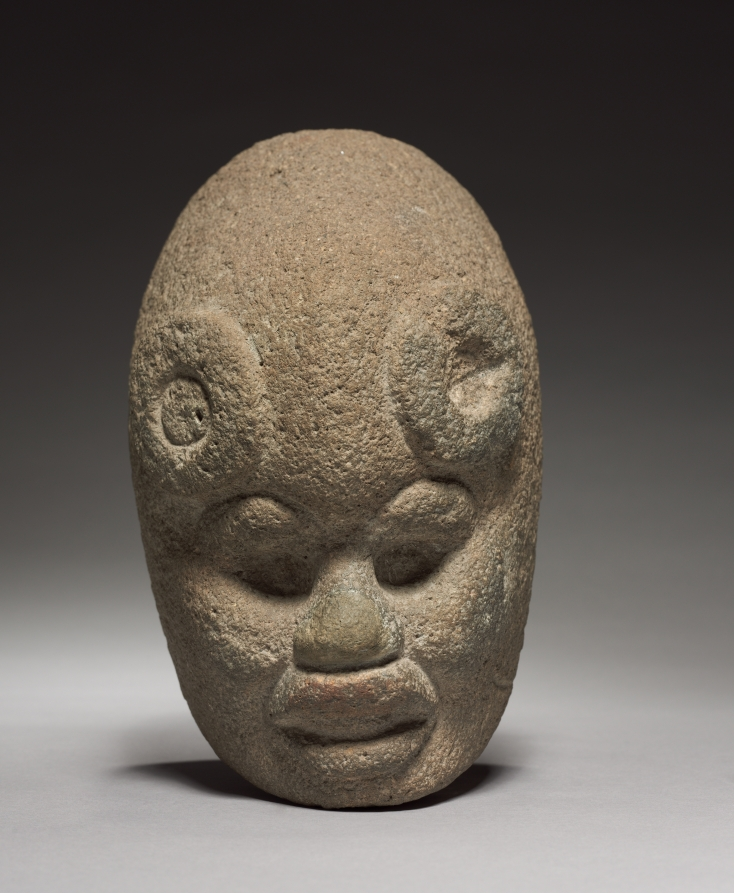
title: Head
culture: Mexico, Classic Veracruz (Totonac or Tajin)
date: 600–1100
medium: stone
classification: Sculpture